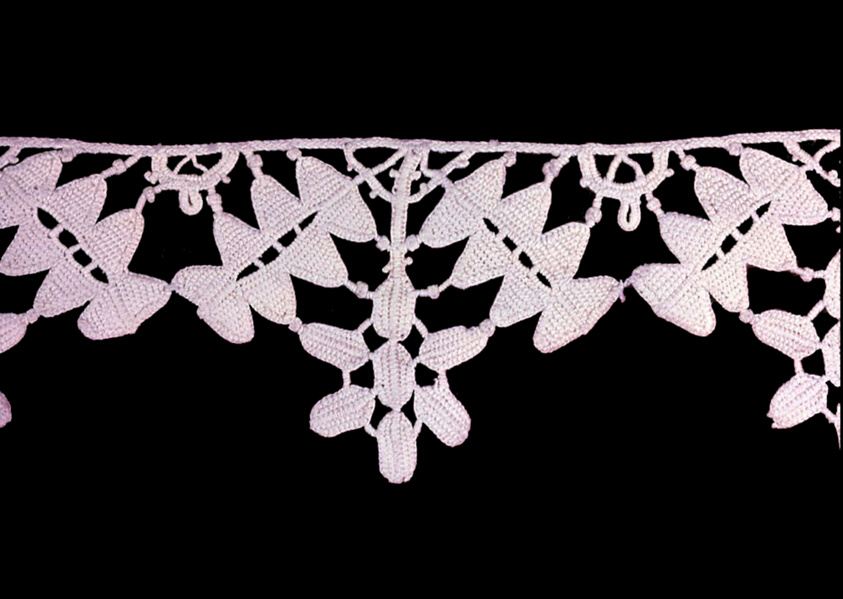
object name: Textile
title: Border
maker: Italy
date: 1601/50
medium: Linen, needle lace worked on a laid and plaited thread grid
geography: Italy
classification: textile; lace - needle